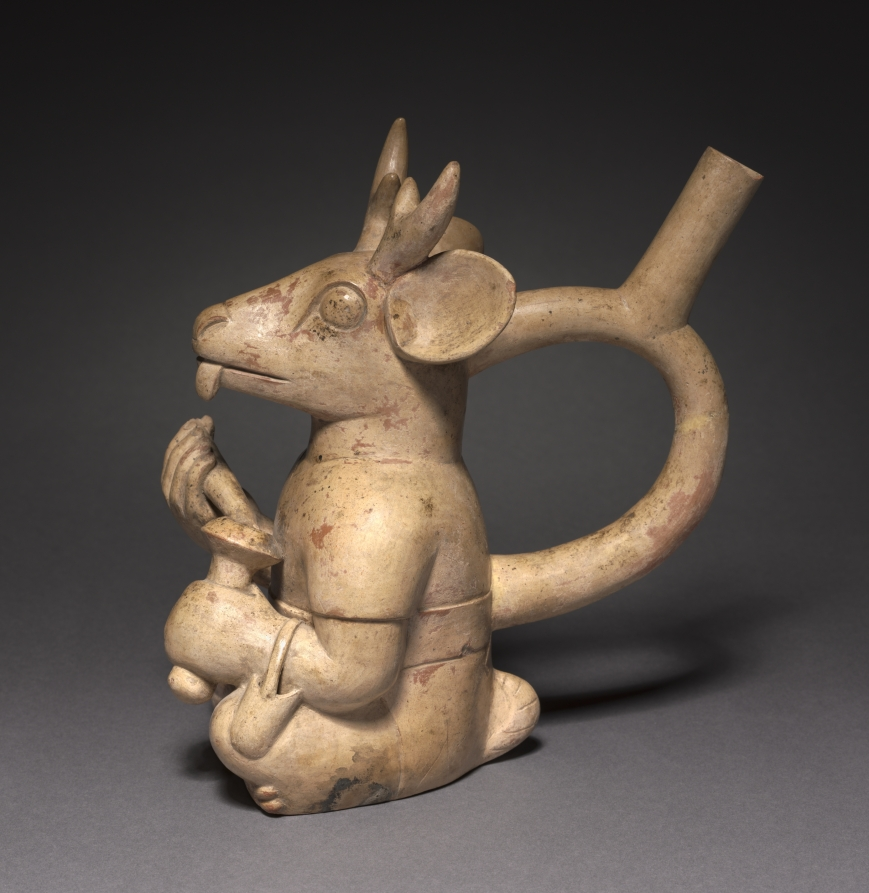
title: Deer-Headed Figure Vessel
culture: Central Andes, North Coast, Moche people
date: 200–850 CE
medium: ceramic, slip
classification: Vessels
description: Moche imagery includes an intriguing world of creatures that mingle traits from different realms: beans sprout human legs and race up a spout, jars leap with human feet to pour themselves, and animals wield weapons in two hands. This figure, with a stag’s head but a human’s body, is an example. He is engaged in a coca-leaf chewing ritual and thus holds a bag for the leaves along with a container of powdered lime that is one of the ritual’s key ingredients.